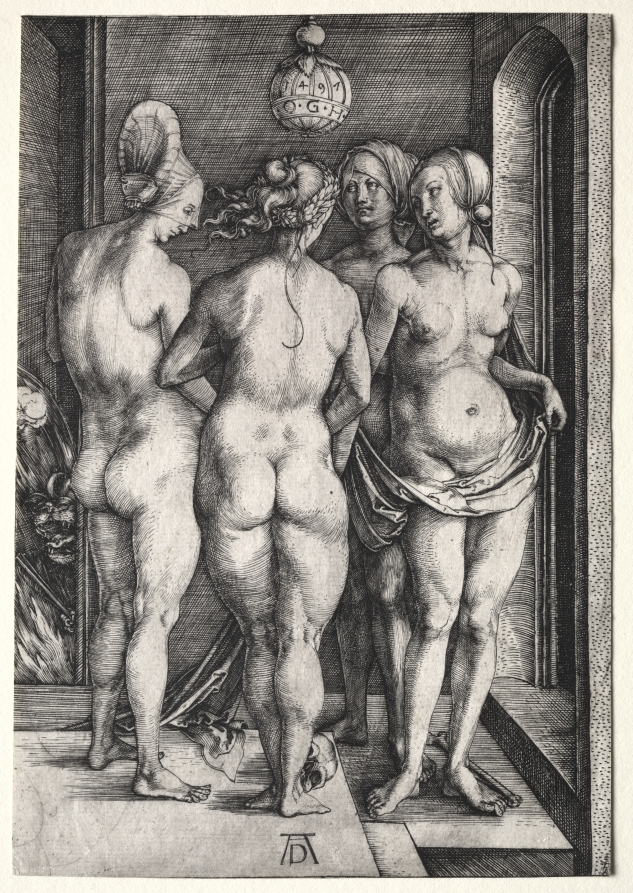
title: The Four Witches (Four Naked Women)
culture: Germany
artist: Albrecht Dürer (German, 1471–1528)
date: 1497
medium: engraving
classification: Print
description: Licentious witches occupied a precarious place during the 16th and 17th centuries, due to their perceived seductive powers that threatened to overturn the patriarchal order of society. The four fleshy women of Albrecht Dürer's beguiling Four Witches exchange vague and shifting glances that suggest sinister intentions. The threatening atmosphere is emphasized by a devil lurking behind an open doorway at the left, and a globe hanging from the ceiling inscribed O.G.H. (O Gott hüte), a proverb that means "Oh God, save us"—in this instance, from these sensual witches.